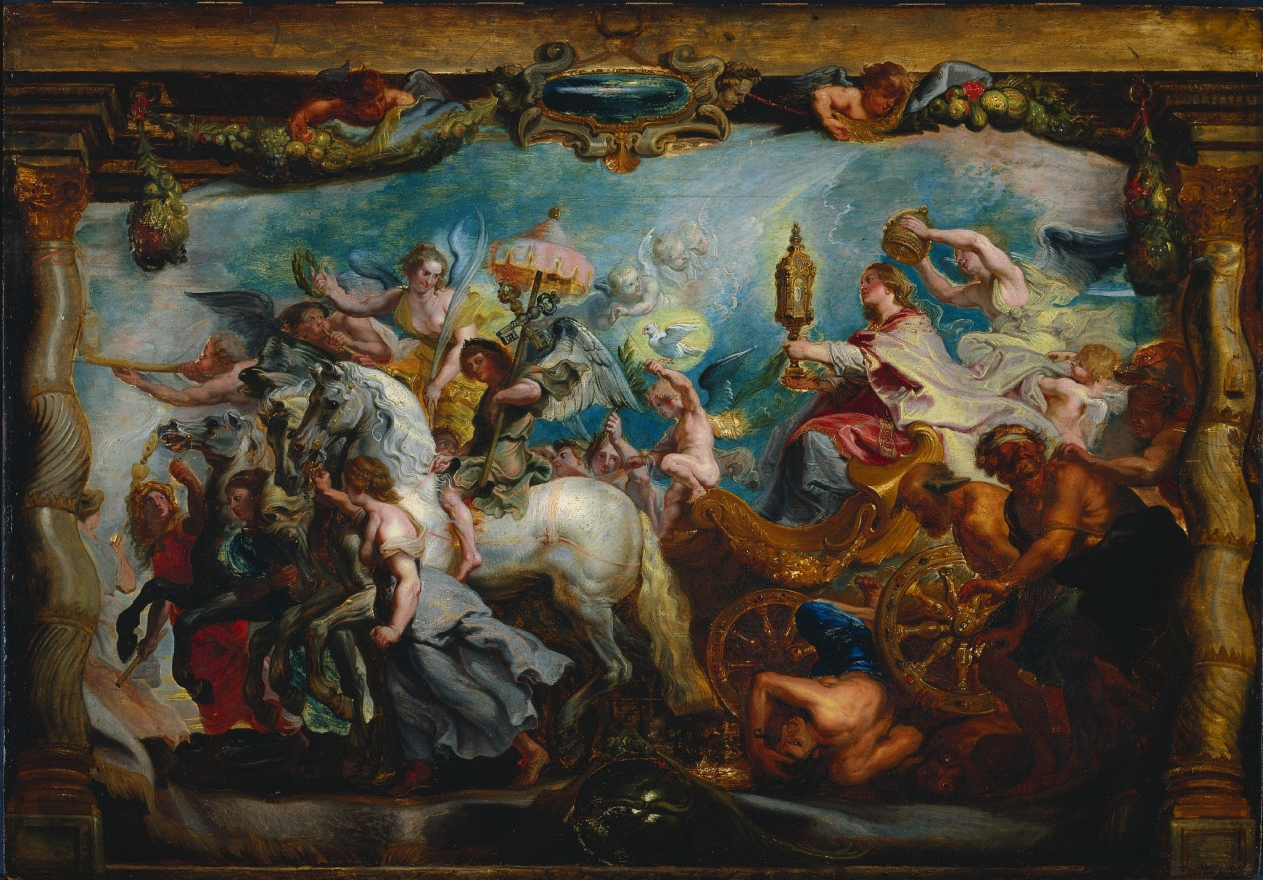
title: The Triumph of the Church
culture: Flanders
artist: follower of Peter Paul Rubens (Flemish, 1577–1640)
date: after 1628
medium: oil on wood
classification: Painting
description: This work is likely a copy after Rubens’s oil sketch for the Triumph of the Eucharist tapestry series. Isabella, daughter of King Phillip II of Spain, commissioned the tapestries for a royal monastery in Madrid. The finished tapestries still hang there today, and the original oil sketch is in the Museo del Prado, Madrid.